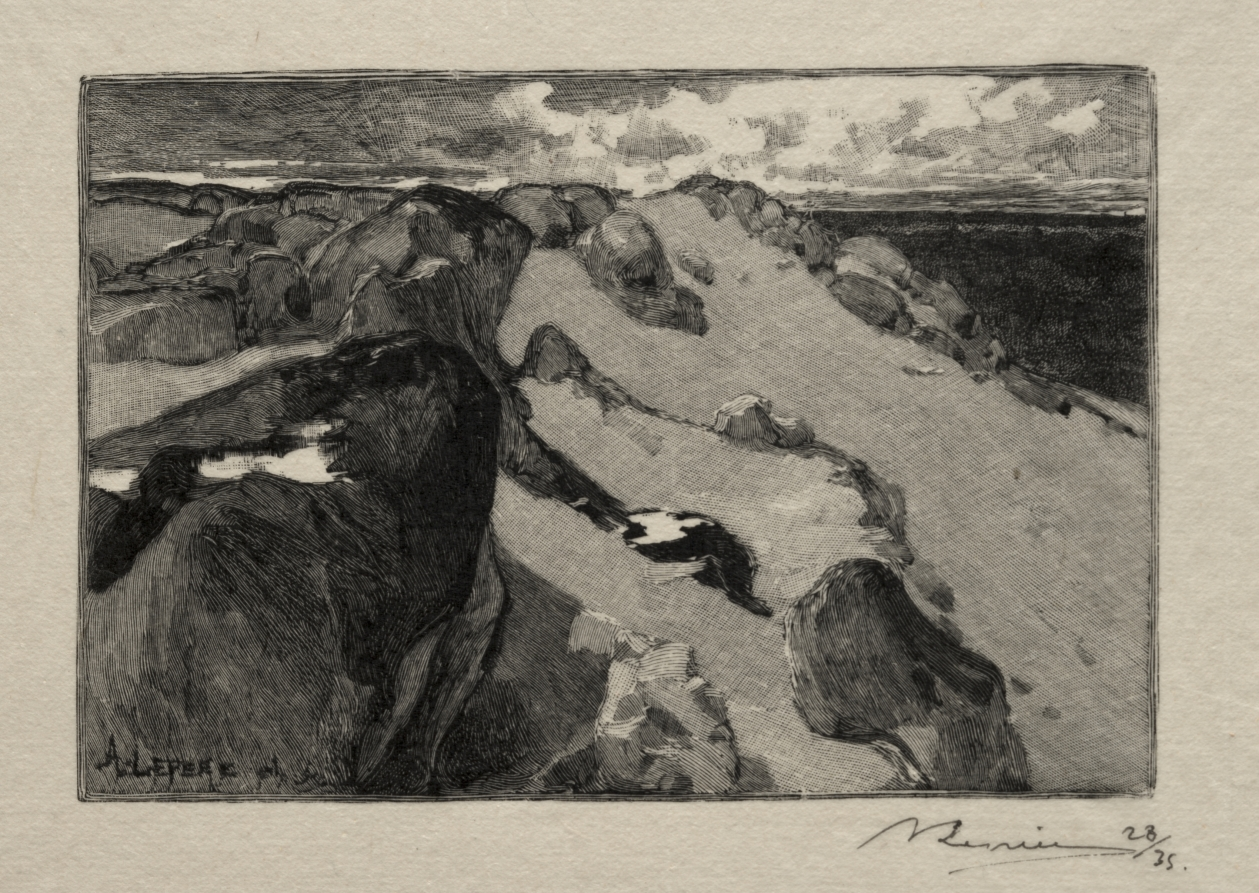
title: Arbonne, le Gros-Sablon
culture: France, 19th-20th century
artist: Auguste Louis Lepère (French, 1849–1918)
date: 1888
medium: wood engraving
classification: Print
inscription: On block, lower left corner: "A. Lepère del. sc."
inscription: Written in ink: "38/35"